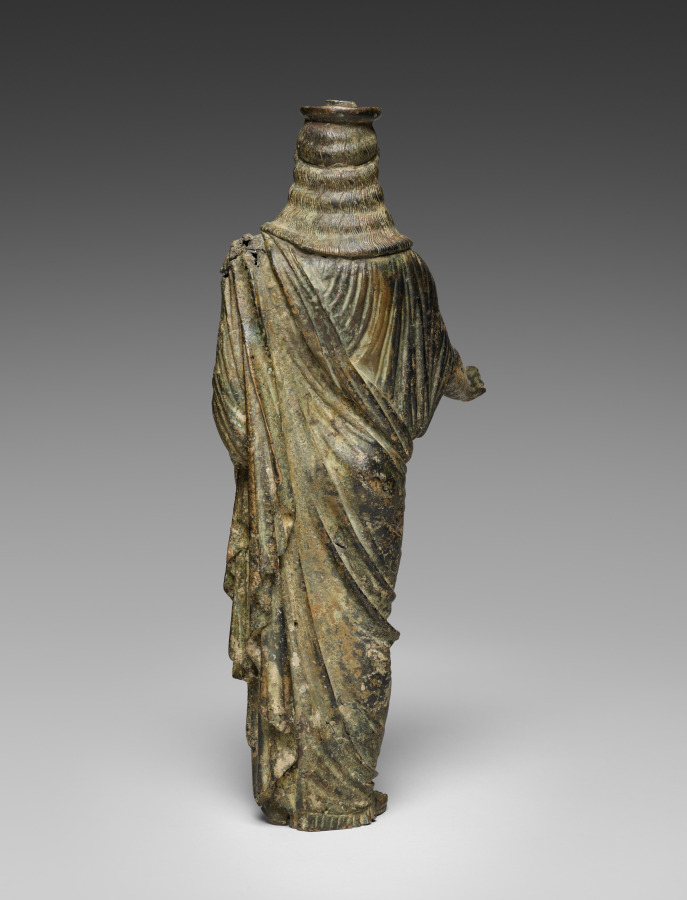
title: Statuette of Dionysos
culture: Italy, Roman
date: 50 BCE–50 CE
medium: bronze and silver and traces of gilding, hollow cast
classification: Sculpture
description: This bronze figure of Dionysos, the god of wine, theater, and the mysteries, is presented in a style recalling Archaic Greek art, most noticeably in his stiff pose and trimmed beard. The more naturalistic folds of his garment speak to a later date, in the Roman period. The disk attached at the top of the head suggests that this figure was once part of an ornate piece of furniture, perhaps a stand or support. In his right hand, the god likely held a kantharos or other attribute. He would have been further embellished with inlaid copper (lips), silver (whites of eyes), and perhaps gilding (garment).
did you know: Over his long, thin garment, Dionysos wears an animal skin, fastened on his left shoulder.